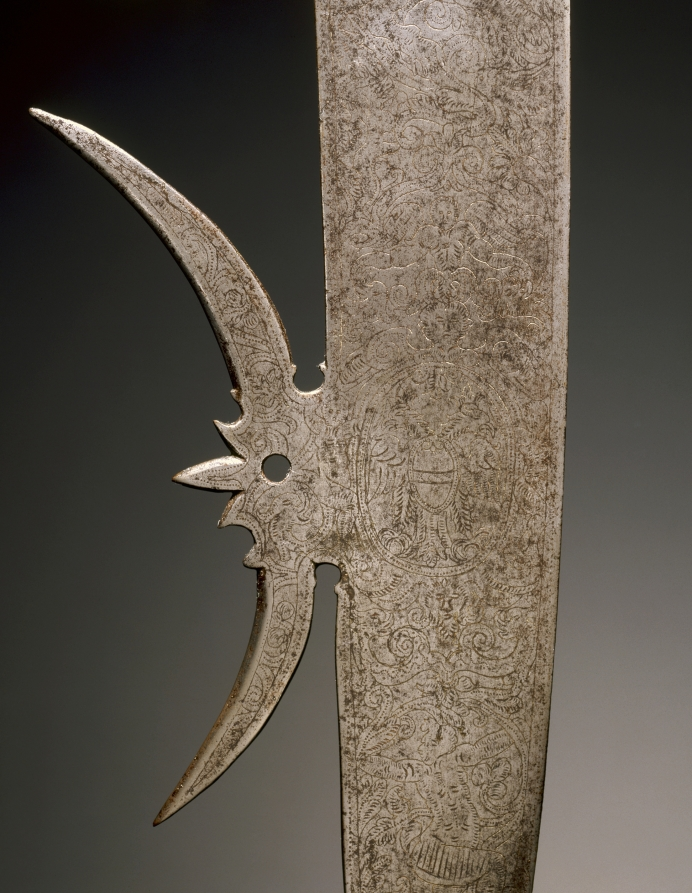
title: Glaive (with Arms of Giustini Family)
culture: Italy, Venice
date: c. 1600–1620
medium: steel, etched; wood haft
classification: Arms and Armor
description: A glaive is a long staff weapon with a large cleaver or knife-like blade. The flat steel blade is conducive to ornamental decoration such as heraldic devices. The decorative nature of this weapon made it a favorite for ceremonial use.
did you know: The large number of surviving glaives that are decorated with the arms of Venetian families indicate its popularity in the city of Venice.